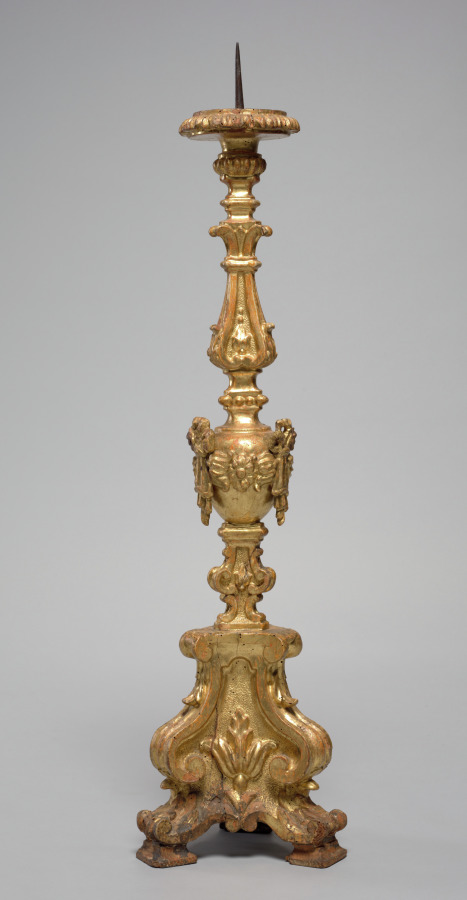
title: Candleholder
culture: Italy, mid-late 17th century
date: mid-late 1600s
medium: gilded wood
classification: Furniture and woodwork